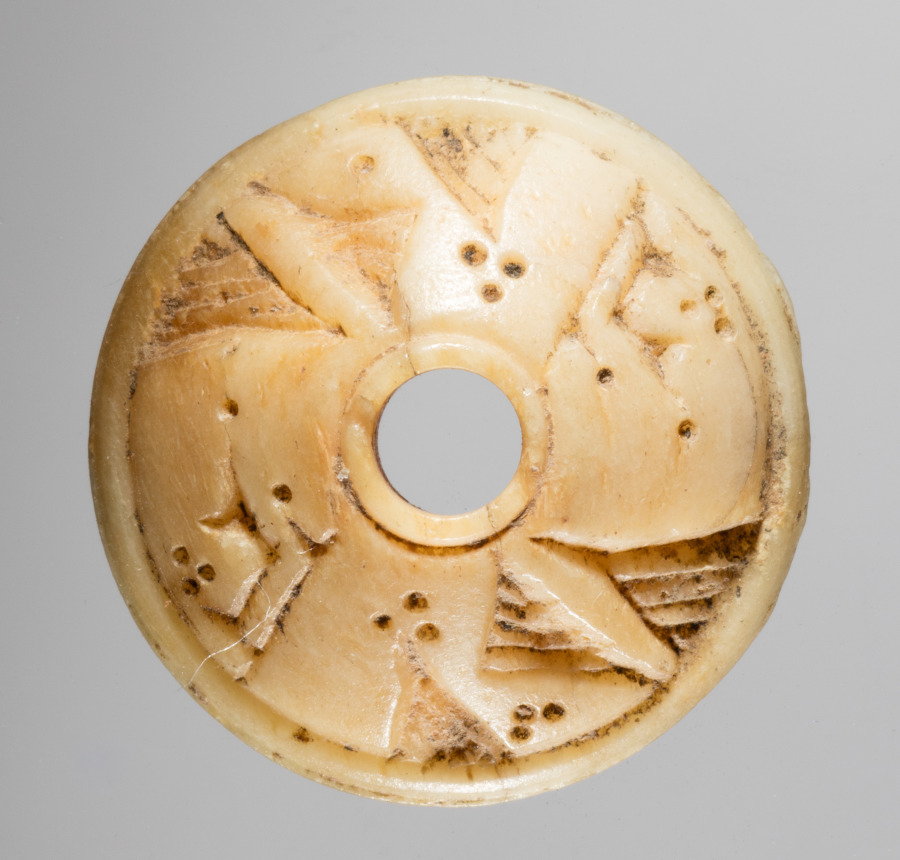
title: Spindle Whorl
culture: Iran, early Islamic period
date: 700s - 900s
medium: bone, incised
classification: Spindle Whorl